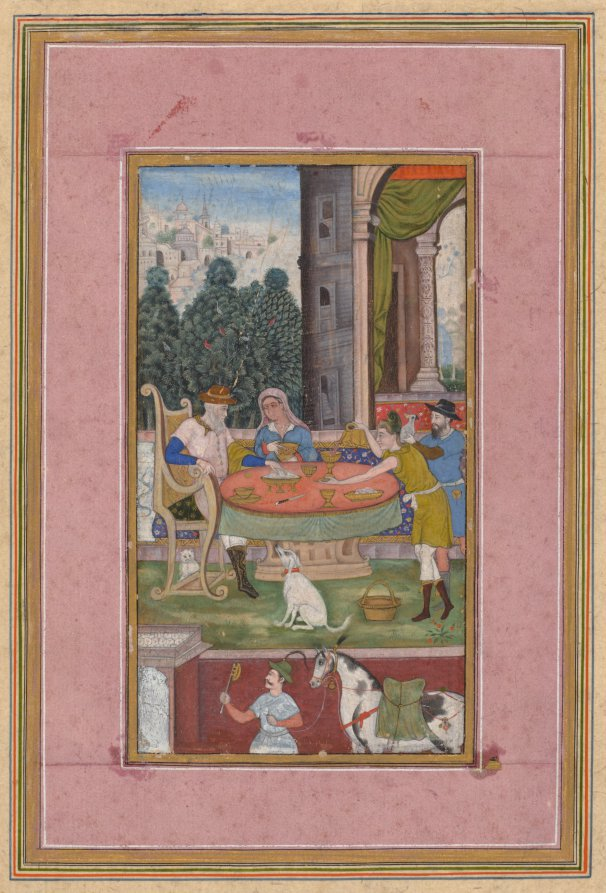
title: Dining Scene with European Elements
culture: India, Subimperial, 16th century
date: c. 1590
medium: color on paper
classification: Painting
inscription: verso: decorative calligraphy